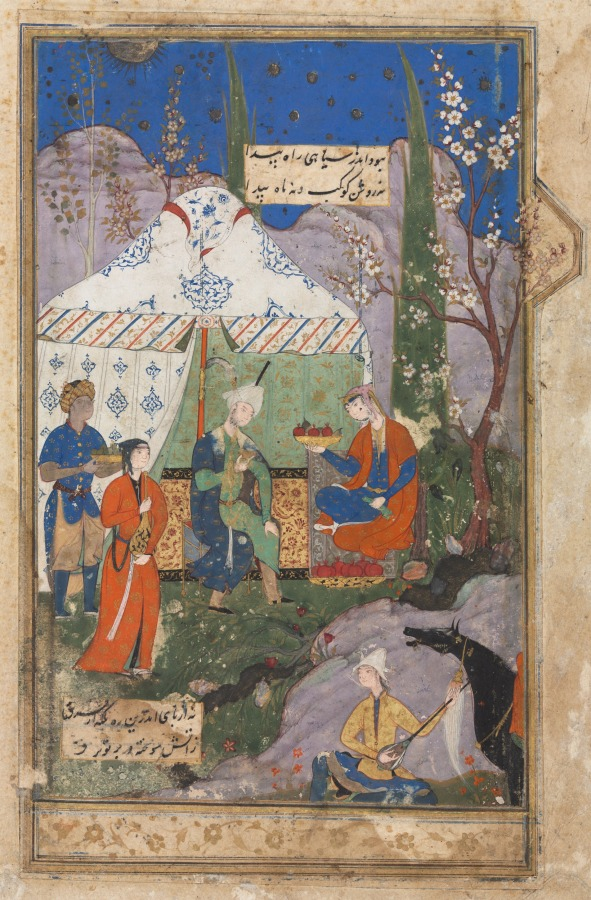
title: An Episode from the Story of the Sasanian King Khusrau and His Beloved Shirin, from a Khamsa (Quintet) of Nizami (1141–1209) (verso); Persian verses from a Haft Awrang (Seven Thrones) of Jami (d. 1492) (recto)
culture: Iran, probably Shiraz, Safavid period (1501-1722)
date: 1540–70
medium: opaque watercolor, gold, silver, and ink on paper; double-sided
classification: Manuscript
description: The Khamsa is a collection of five narrative poems, one of which is dedicated to the romance of Khusrau Parviz (590–628), a Sasanian king of Iran, and Shirin, his beloved Armenian princess. The lovers are seated in a nocturnal landscape, indicated by the dark blue sky dotted with stars, painted with now tarnished silver. Shirin serves figs and pomegranates, symbolic of fertility, to Khusrau as attendants bring more figs and wine. Next to Shirin’s black horse, the musician at bottom right plays a tanbur, a long-necked, fretted lute.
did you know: Khusrau’s turban has the anachronistic baton worn by Safavid royalty and the egret feather, an emblem of nobility instituted by the Mongols in the 1200s.